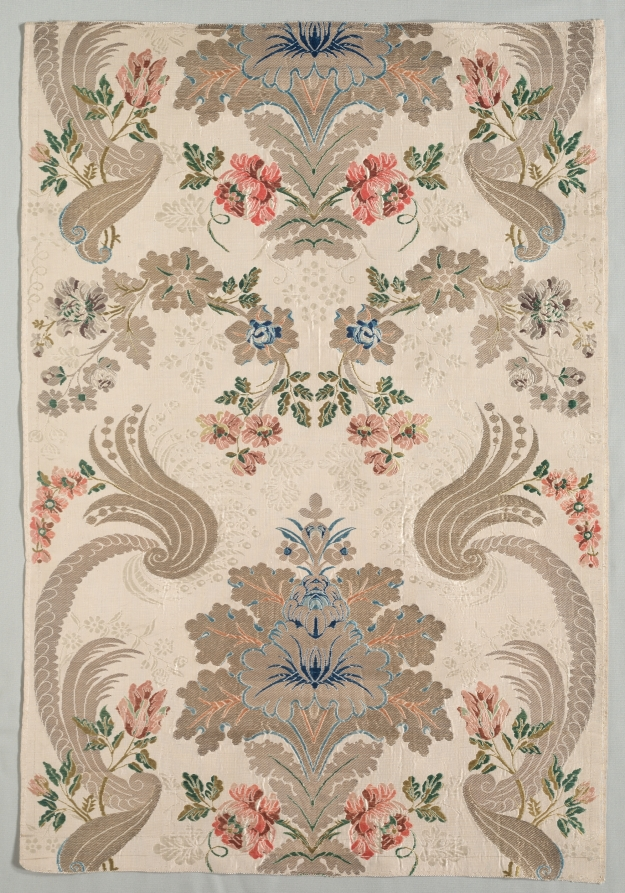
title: Taffeta, Brocaded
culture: France, first half 18th century, late Baroque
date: 1700–1750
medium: taffeta, brocaded; silk, silver, and gold thread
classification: Textile